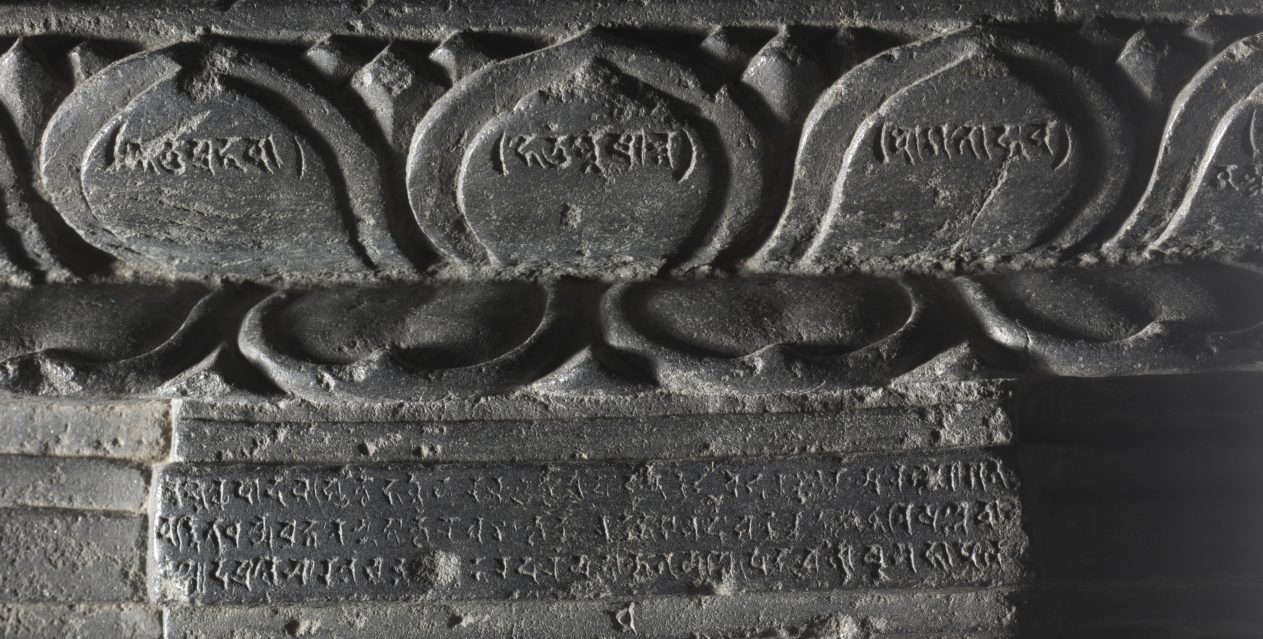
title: Buddha Calling on Earth to Witness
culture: Northeastern India, Bihar, Tetravan, Pala Period (750-1197)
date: 800s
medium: chloritic schist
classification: Sculpture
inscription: Ye dharmā hetu prabhavā tesā hetu tathāgata hya vadat...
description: This sculpture is one of a series that depict the Buddha at different scenes in his life. Here, he is at Bodhgaya, the place where he achieved enlightenment. At the top of the composition are the branches of the ficus tree with its heart-shaped leaves, under which he achieved enlightenment. His hand gesture indicates that he is calling upon the goddess of the earth to witness the moment. During the Pala period of the eighth through 12th centuries in medieval India, Buddhism dominated and flourished in major monastic universities. After the fall of the Pala dynasty, the numerous battles between small kingdoms vying for power caused the destruction of the Buddhist monasteries, and Buddhist monks fled with texts and movable art to Nepal, Tibet, and Southeast Asia, so that by the 14th century, Buddhism was eradicated in India.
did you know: The donors kneel at the lower corners.